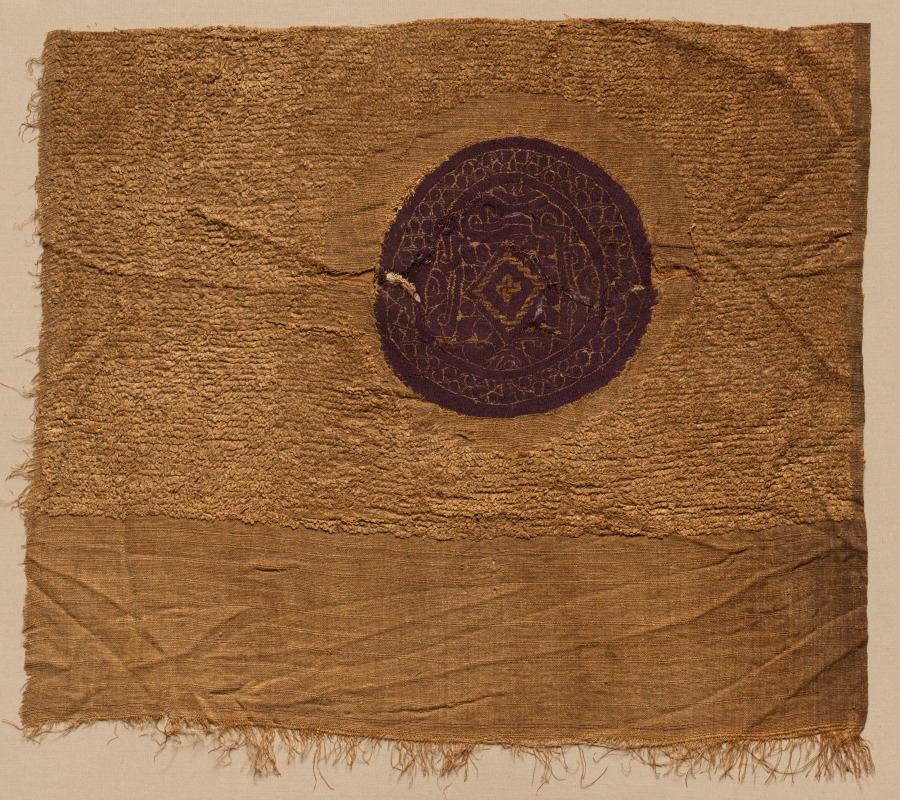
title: Fragments with Gold Foil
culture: Egypt, Byzantine period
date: 300s–400s CE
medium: undyed linen, dyed wool, and gold foil; plain weave with supplementary weft-loops, slit-tapestry weave with supplementary weft wrapping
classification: Textile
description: The rare gold foil and rich purple wool in these two fragments originally enriched a luxurious fabric. Costly gold foil wrapped around a silk core forms the central motif within a diamond, woven in tapestry weave. The surrounding interlacing knot design—achieved with three overlapping squares (in the small fragment) or interlacing squares (in the large fragment)—offered protection from danger and harm. The roundels were woven with extra, or supplementary, linen wefts wrapped on the purple ground. Linen pile loops in the ground fabric resisted abrasion in furnishing fabrics and provided insulation in tunics.